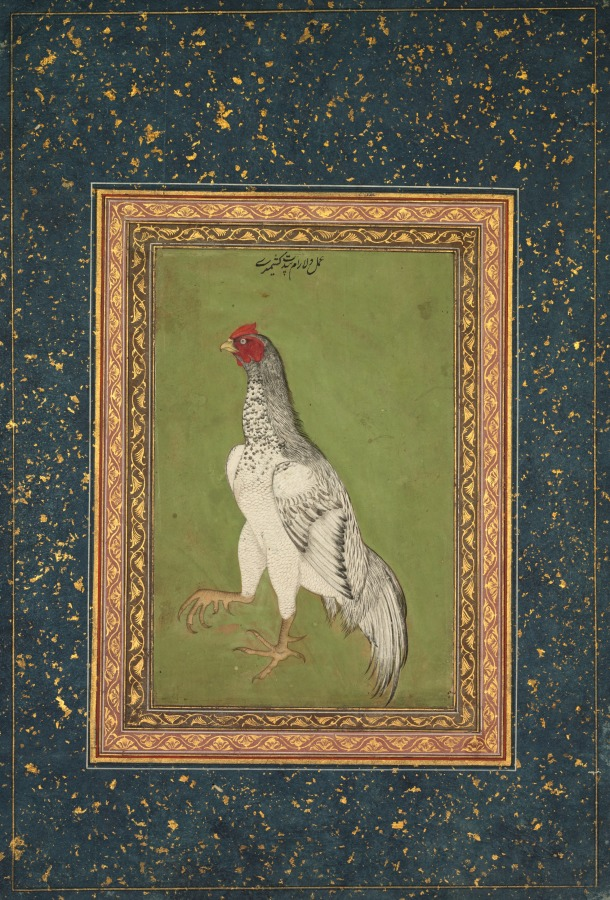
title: Rooster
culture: India, Mughal, 17th century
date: c. 1620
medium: Gum tempera, ink, and gold on paper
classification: Painting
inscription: verso, upper center: Dilaram Pandit Kashmiri (by a later hand)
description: This bird, with its fierce expression, sharp beak, and spurred feet, may have been a champion in the cockfighting ring. The Mughal emperor Jahangir requested that his royal court artists paint portraits of remarkable birds and animals with as much realism as possible. He felt that such paintings enhanced feelings of amazement beyond hearing or reading an account.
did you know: This page belonged to the owner of Cleveland’s Leisy Brewing Company, est. 1873.